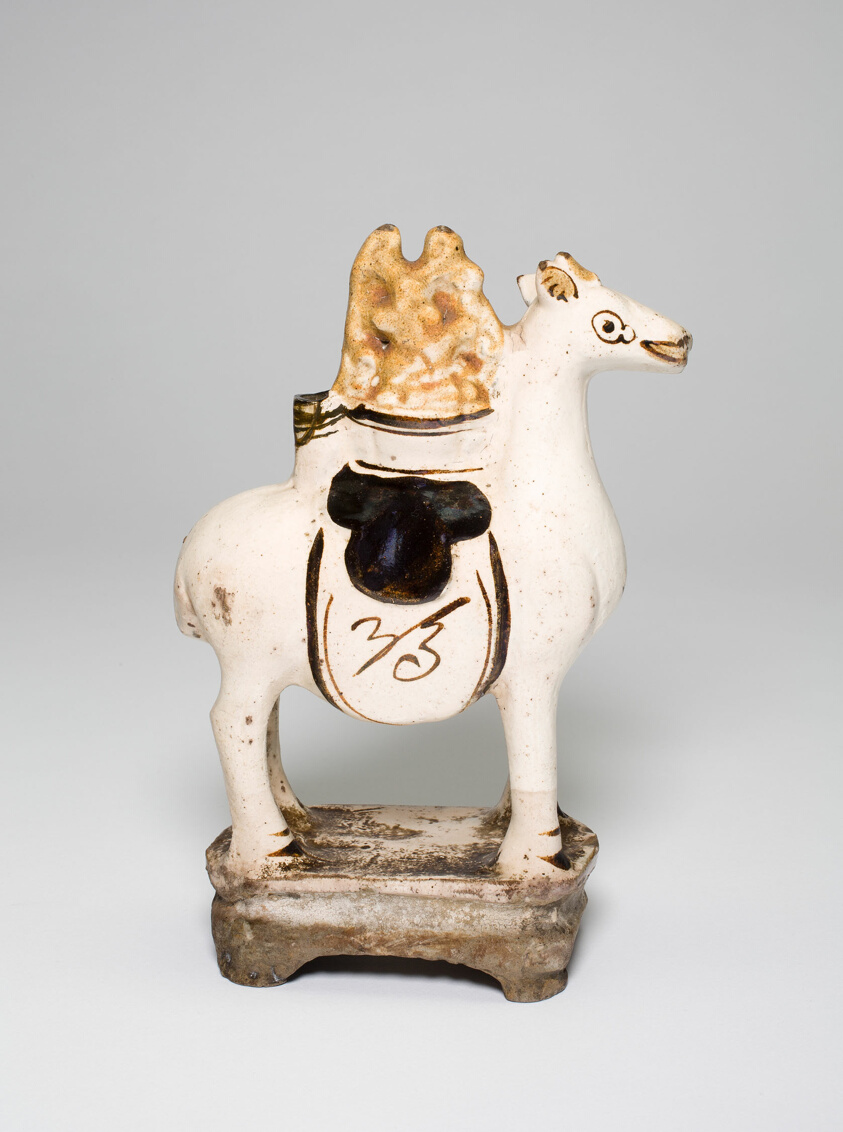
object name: Sculpture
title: Camel Figurine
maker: China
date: Ming dynasty (1368–1644)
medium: Cizhou ware; slip-coated stoneware with iron brown glaze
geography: China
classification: stoneware; asian art; ceramics